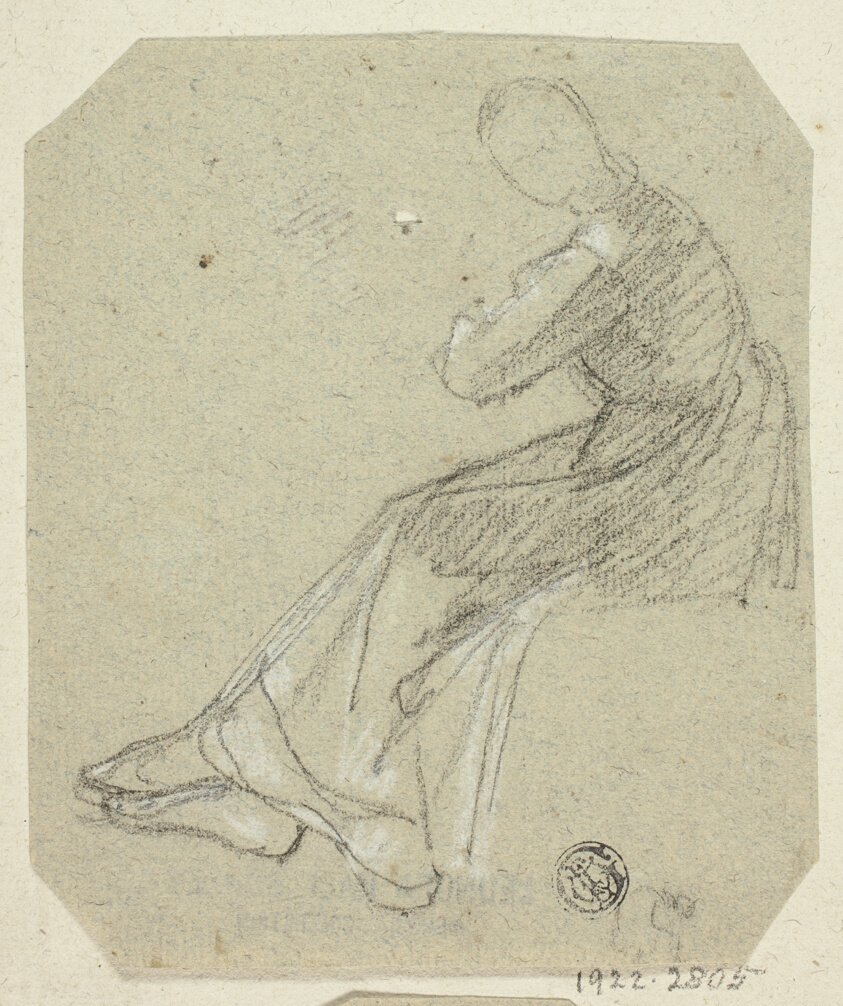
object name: Drawing and Watercolor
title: Seated Woman in Profile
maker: Unknown Artist; British, 19th century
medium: Black chalk, heightened with touches of white chalk, on gray laid paper with blue fibers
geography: United Kingdom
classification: chalk; paper; drawings (visual works); prints and drawing